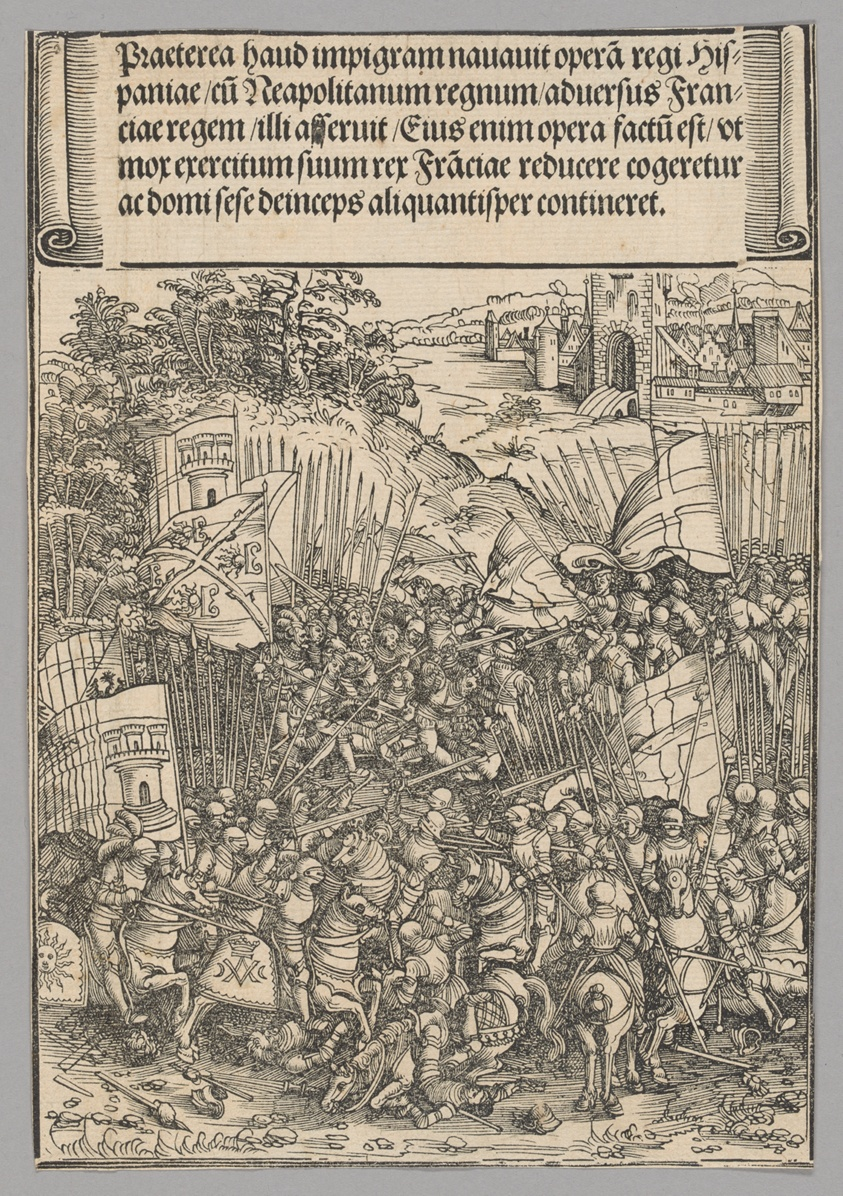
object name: Print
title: Conquest of Naples, plate 17 from Historical Scenes from the Life of Emperor Maximilian I from the Triumphal Arch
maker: Wolf Traut (German, c. 1480-1520); printed by Hieronymus Andreae (German, died 1556)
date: 1515-17, printed c. 1520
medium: Woodcut in black ink on cream laid paper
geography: Germany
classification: print; paper; woodcut; prints and drawing